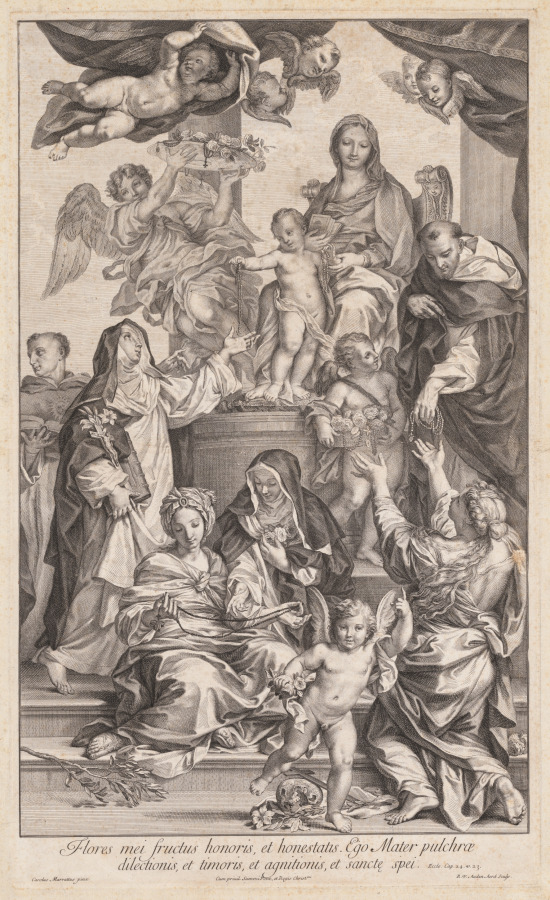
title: Virgin and Child with Saints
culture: Netherlands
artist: Robert van Audenaerd (Dutch, 1663–1743)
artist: after Carlo Maratti (Italian, 1625–1713)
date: c. 1720–30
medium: engraving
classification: Print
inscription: in plate, lower margin: Flores mei fructus honoris, et honestatis. Ego Mater pulchrae / dilectionis, et timoris, et agnitionis, et sancte spei. Eccle: Cap. 24.v.23. / Carolus Marrattus pinxt. Com privil Summi Pont, et Regis Christ. R. v. Auden Aerd Sculp.